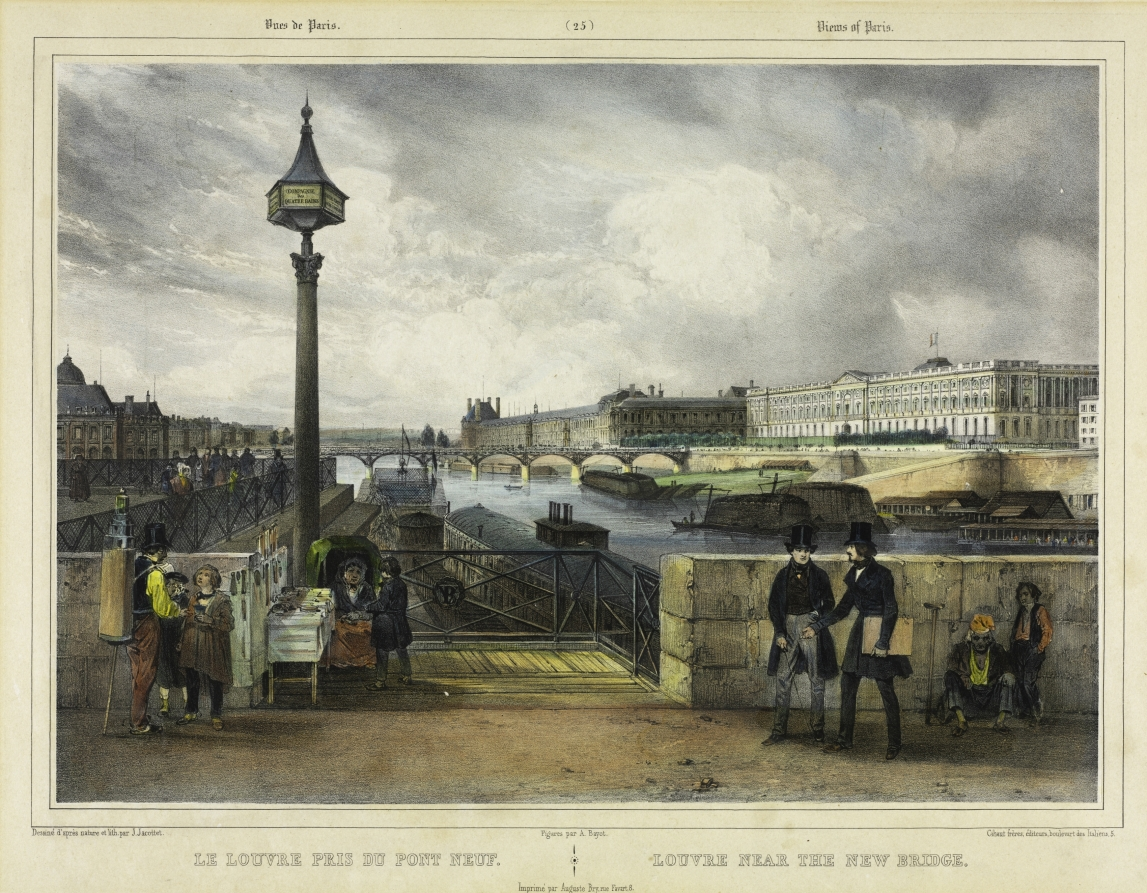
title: The Louvre near the New Bridge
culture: Switzerland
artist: Julien Louis Jacottet (Swiss, 1806–1880)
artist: Adolphe Jean Baptiste Bayot (French, 1810–1866)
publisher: Gihaut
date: 1838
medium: color lithograph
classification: Print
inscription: Bottom of sheet, in pencil: "2237-II 15 x 21 1/8 3+3 ¼ show ¼ #16 268 toned as others"